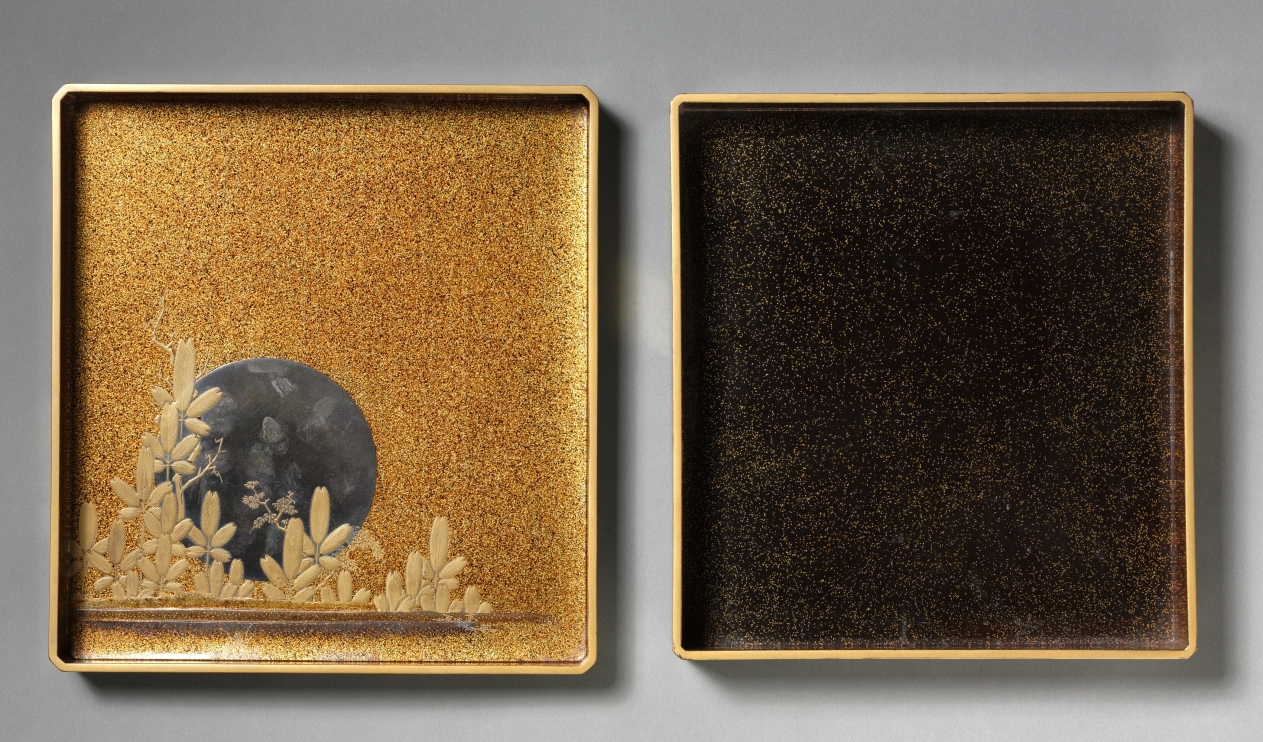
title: Writing Box with Spitting Courtesan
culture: Japan, Edo period (1615–1868)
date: early to mid-1800s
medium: Lacquered wood with maki-e (image made of sprinkled gold dust)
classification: Lacquer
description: The design on this writing box shows a courtesan who has just completed an impressive feat of spitting the term shinobukoi (忍恋), which could be translated as “hidden love” or “unrequited love,” on an earthen wall. The phrase appeared in classical Japanese poetry anthologies produced by nobles writing in ink on the finest decorated papers. Here, the confining walls of the brothel district become a space for public announcement in graffiti, with the medium being perhaps tea.